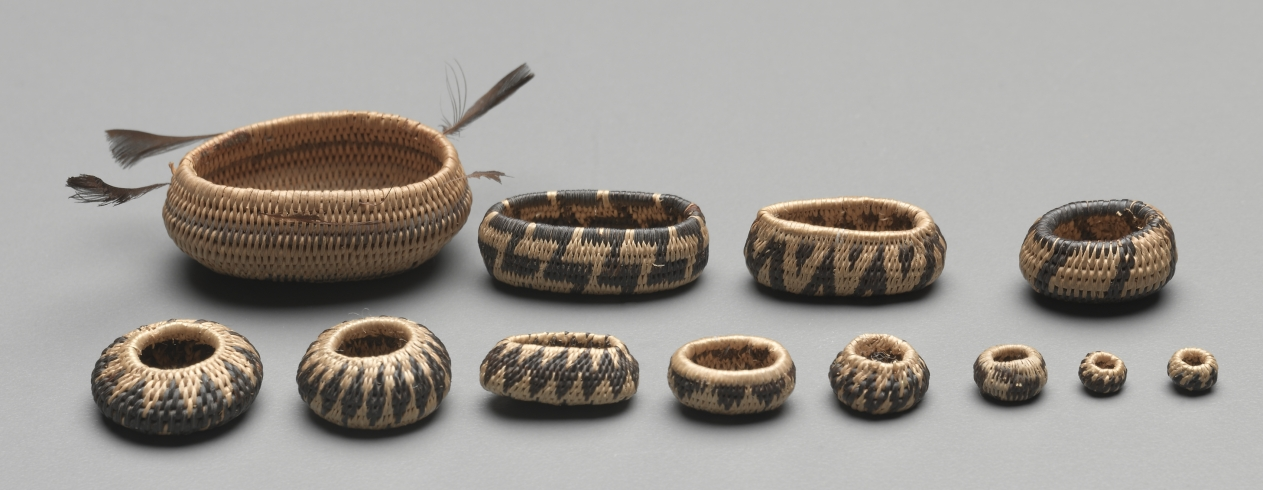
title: Miniature Round Basket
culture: California, Pomo, late 19th-early 20th century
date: late 1800s-early 1900s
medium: plant materials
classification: Basketry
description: Miniature baskets were made to demonstrate the basket-maker’s virtuoso skill, and these tiny marvels seem to be no exception—the smallest are just a few millimeters wide but still patterned. For such fine work, dexterity was required as much for preparation of materials as for weaving.